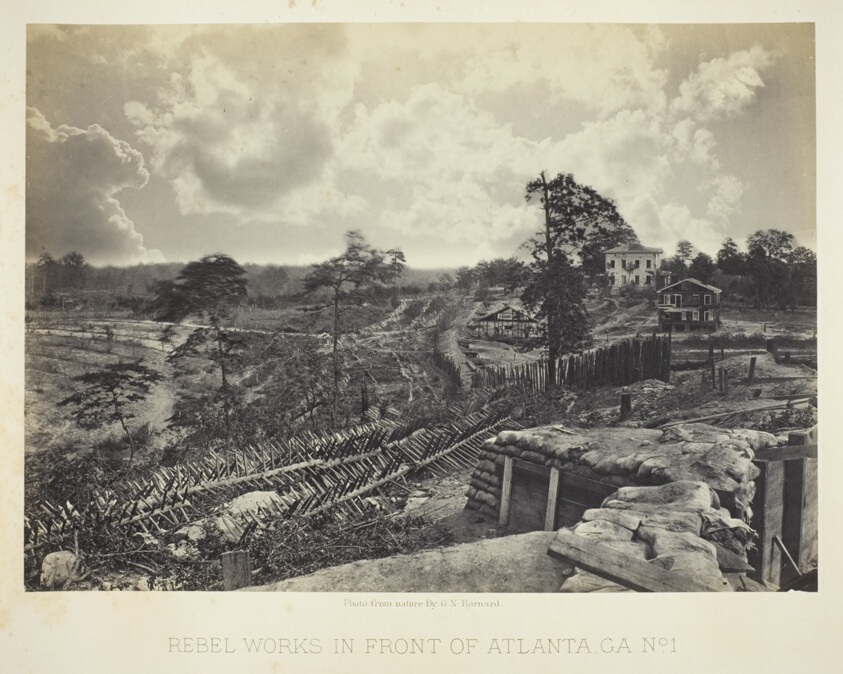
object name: Photograph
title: Rebel Works in Front of Atlanta, GA, No. 1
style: 19th century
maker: George N. Barnard (American, 1819–1902)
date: 1864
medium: Albumen print, plate 39 from the album "Photographic Views of the Sherman Campaign" (1866)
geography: Atlanta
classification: albumen silver print; photographic process; photography; photograph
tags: Collected by Hugh Edwards, Sherman's Campaign 1866